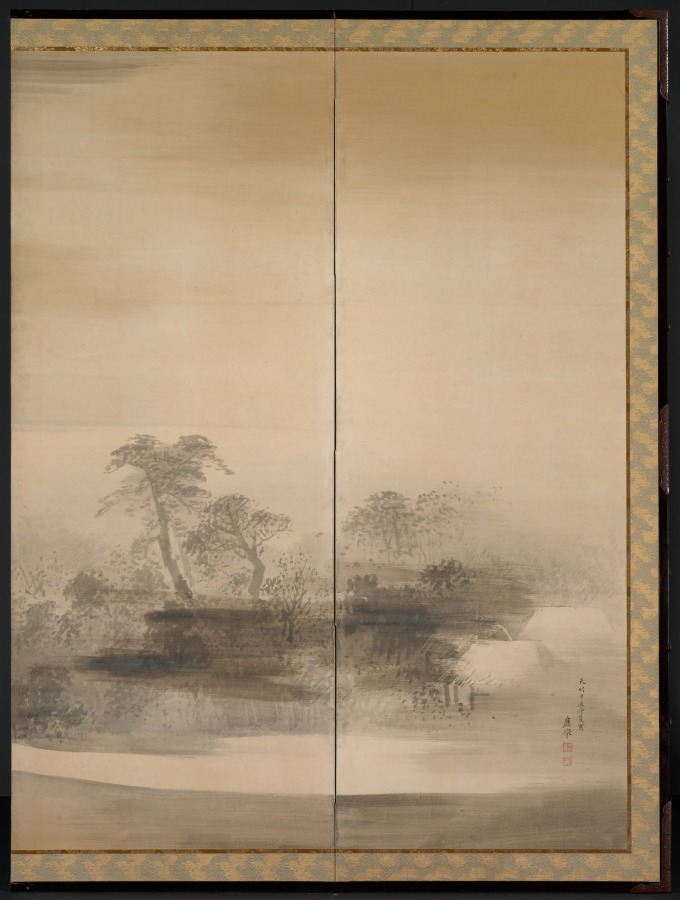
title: Summer Night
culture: Japan, Edo period (1615–1868)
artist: Maruyama Ōkyo (Japanese, 1733–1795)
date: 1784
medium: Six-panel folding screen, ink, gold, and silver on paper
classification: Painting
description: Ōkyo painted these panoramas in the summer of 1784. Regarded as Kyoto's most important painting teacher and accomplished artist, he had studied Western painting techniques, "realistic" sketching from nature, and traditional Japanese style painting (yamato-e). The naturalistic quality of these scenes results from a blend of detailed observation of nature and a remote, even detached regard for man's place in the world.